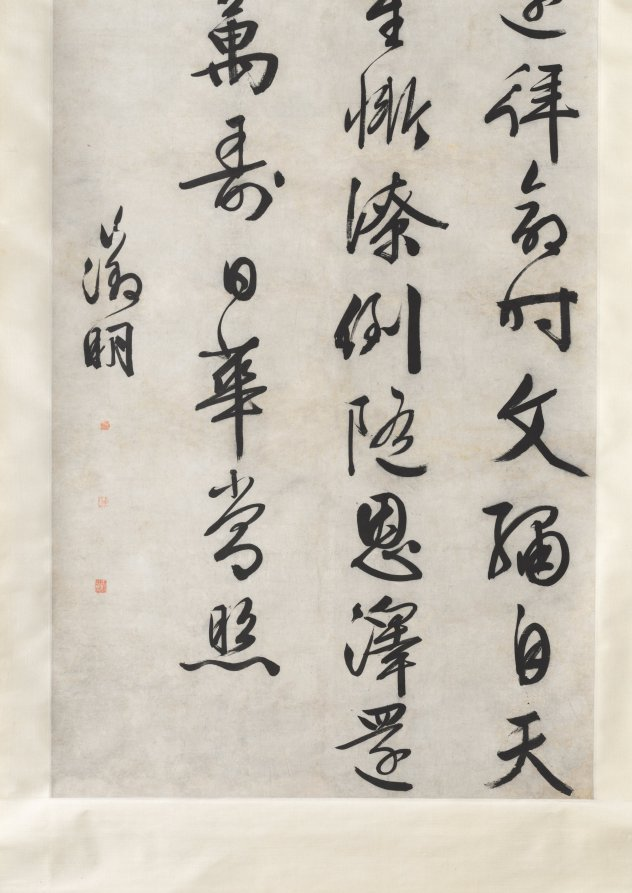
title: Poem on Imperial Gift of an Embroidered Silk: Calligraphy in Running-Standard Script (xingkaishu)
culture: China, Suzhou, Ming dynasty (1368-1644)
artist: Wen Zhengming (Chinese, 1470–1559)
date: c. 1525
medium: Hanging scroll; ink on paper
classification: Calligraphy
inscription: The text of the calligraphy, which is also included in Wen Zhengming's literary compilation, can be translated as follows: From the throne, this exquisite silk was bestowed on me,/ As I expressed my gratitude to His Majesty by the Goldwater Bridge./ This heavenly silk is embroidered with five colors./ Resplendent it is, draping over my arm with [designs of] twin dragons./ Having received such a gift, I [bowed] in shame over my lack of achievements./ Humbly I returned to my rank to observe the grand ceremony./ I wish His Majesty shall live on for myriad years,/ And the sun will always shine upon His trailing robe.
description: A poem by the influential Wen Zhengming from Suzhou in southeastern China expresses Wen’s gratitude to the Jiajing emperor (reigned 1522–67) for a gift of embroidered silk bestowed in appreciation of his commendable service. The elegant, well-composed, and energetically written large characters in deep black ink reflect the handwriting of a distinguished scholar-artist. Works of calligraphy by Wen of this large scale are rare. The poem reads: As I expressed my gratitude to His Majesty by the Goldwater Bridge. This heavenly silk is embroidered with five colors. Resplendent it is, draping over my arm with [designs of] twin dragons. Having received such a gift, I [bowed] in shame over my lack of achievements. Humbly I returned to my rank to observe the grand ceremony. I wish His Majesty shall live on for myriad years, And the sun will always shine upon His trailing robe.